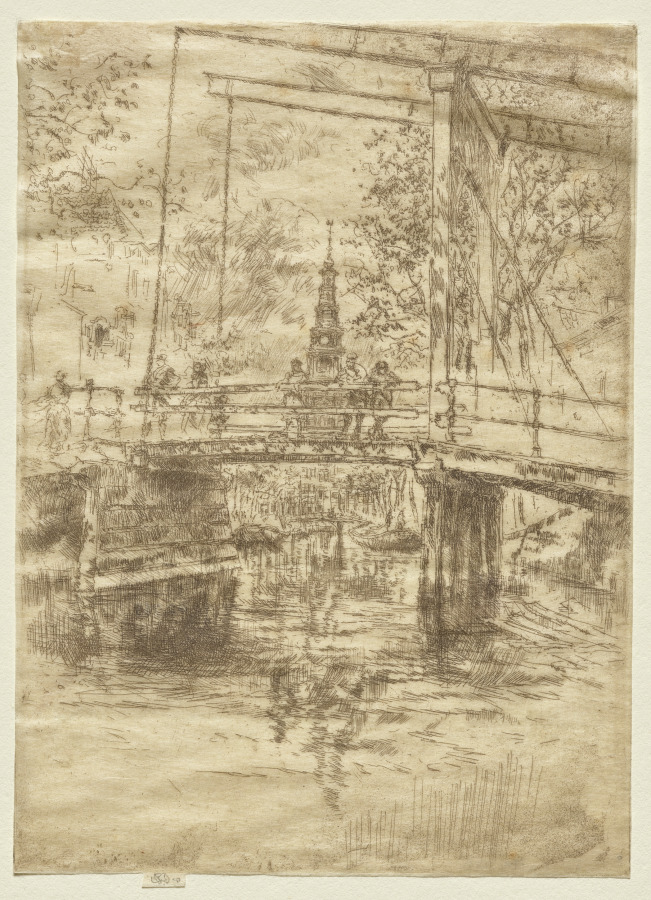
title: Little Drawbridge, Amsterdam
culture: America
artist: James McNeill Whistler (American, 1834–1903)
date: 1889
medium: etching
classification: Print